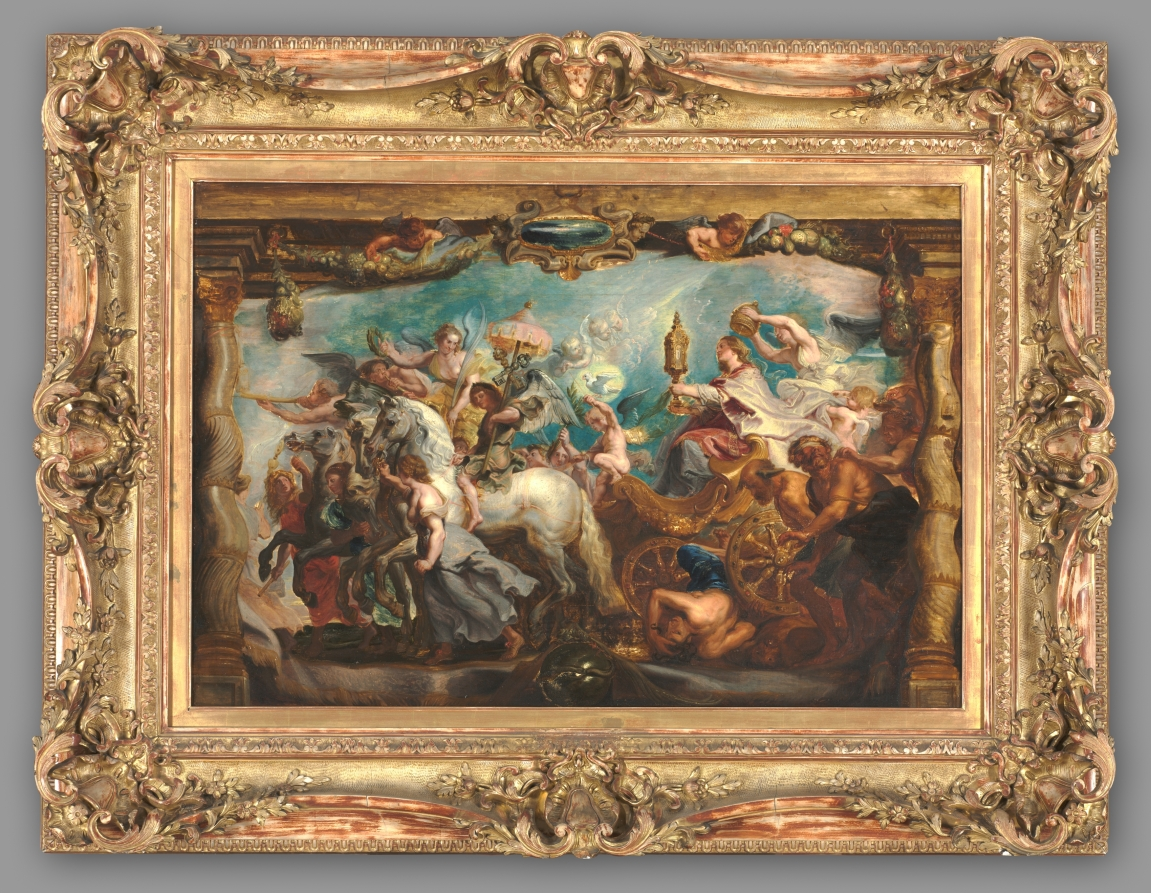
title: The Triumph of the Church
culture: Flanders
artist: follower of Peter Paul Rubens (Flemish, 1577–1640)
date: after 1628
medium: oil on wood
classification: Painting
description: This work is likely a copy after Rubens’s oil sketch for the Triumph of the Eucharist tapestry series. Isabella, daughter of King Phillip II of Spain, commissioned the tapestries for a royal monastery in Madrid. The finished tapestries still hang there today, and the original oil sketch is in the Museo del Prado, Madrid.